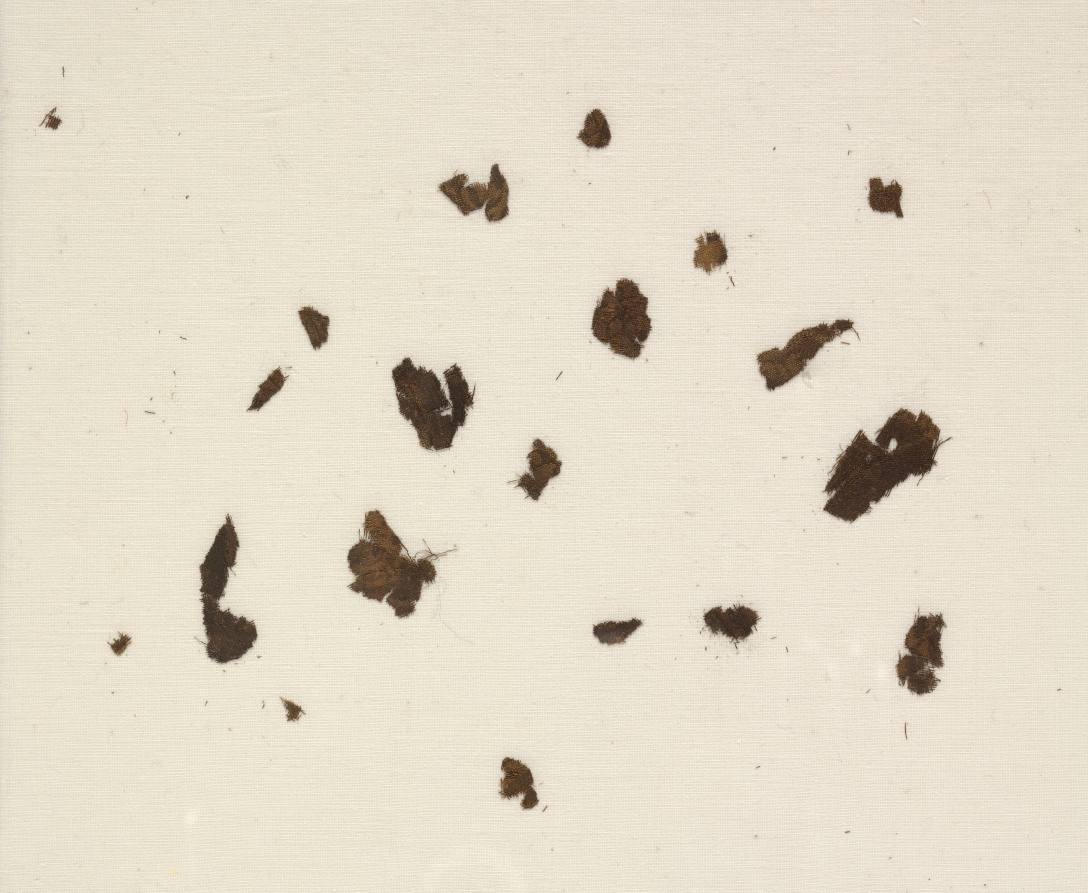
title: Fragment with falconer riding a bull in a rondel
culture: Iran, Rayy, Seljuk period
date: 1000s–1100s (radiocarbon date, 95% probability)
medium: Silk: double cloth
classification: Textile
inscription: inner band of a foliate Kufic inscription: ". . . . . . wa-bastah wa-'ala['] lil-shay[kh?] al-sayyid al-mansur al-mu['a] yyad Abi Nasr . . . bin[?] . . ."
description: The princely sport of falconry was frequently represented in medieval luxury silks. Here, the falconer wears a jeweled turban, the most significant item of men’s dress, and rides sidesaddle on a bull. His tunic displays two small designs: overlapping octagons and the conventional star and cross motif. On his gloved hand, he probably supports a coveted gyrfalcon, a large, superior bird. The border displays an inner inscription and an outer animal procession, an ancient Near Eastern theme, of real and mythical creatures. This double cloth has two distinct layers that exchange position according to the pattern. The crisply broken edges and scattered brittle threads are typical of the fragility of authentic medieval Iranian silks.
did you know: The falconer's round face with delicate features represents the ideal Iranian beauty, complemented by the chic round hairballs beside his cheeks.